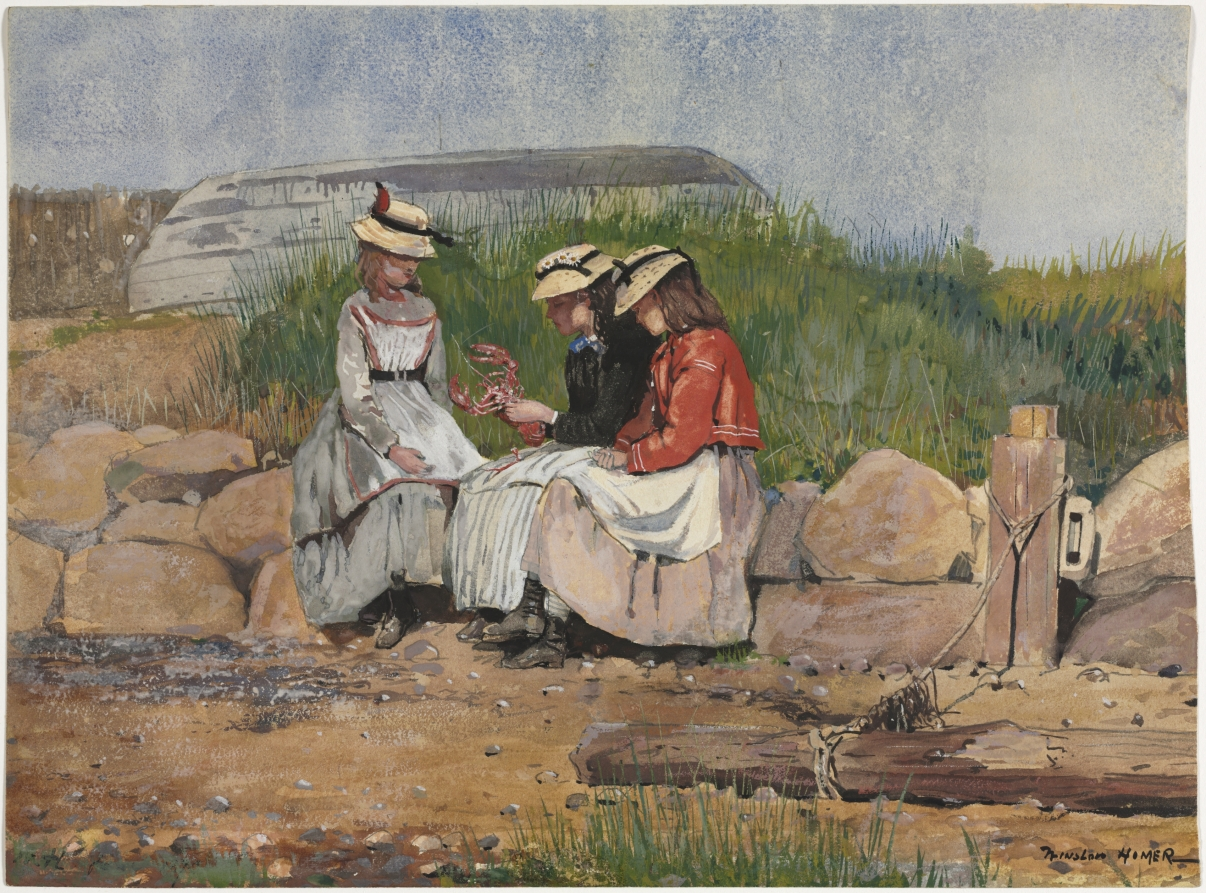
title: A Fisherman's Daughter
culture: America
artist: Winslow Homer (American, 1836–1910)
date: 1873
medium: watercolor and gouache over graphite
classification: Drawing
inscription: Signed: "Winslow Homer" lower right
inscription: Remnants of signature, lower left: "W.H. June 1873"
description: Homer created some of the most luminous and influential watercolors in the history of the medium. A Fisherman’s Daughter, painted in Gloucester, Massachusetts, is among a group of works that represent his first sustained use of the medium. Here, three girls sit on the shore of a sunlit beach and play with a lobster. Their downcast eyes suggest a solemn tranquility to their activity. The life of the local fishermen was perilous; they often spent weeks away from home and were sometimes lost at sea. Thus, waiting was a central part of life for Gloucester families. An overturned boat on the dunes behind the figures evokes the ominous form of a coffin.